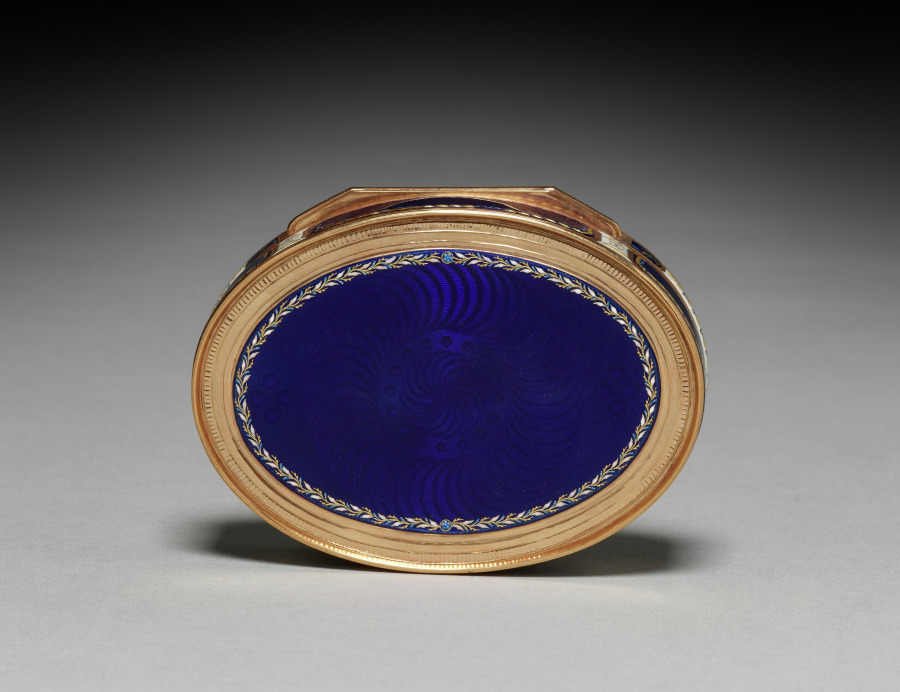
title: Box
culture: Switzerland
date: late 1700s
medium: gold and enamel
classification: Miscellaneous